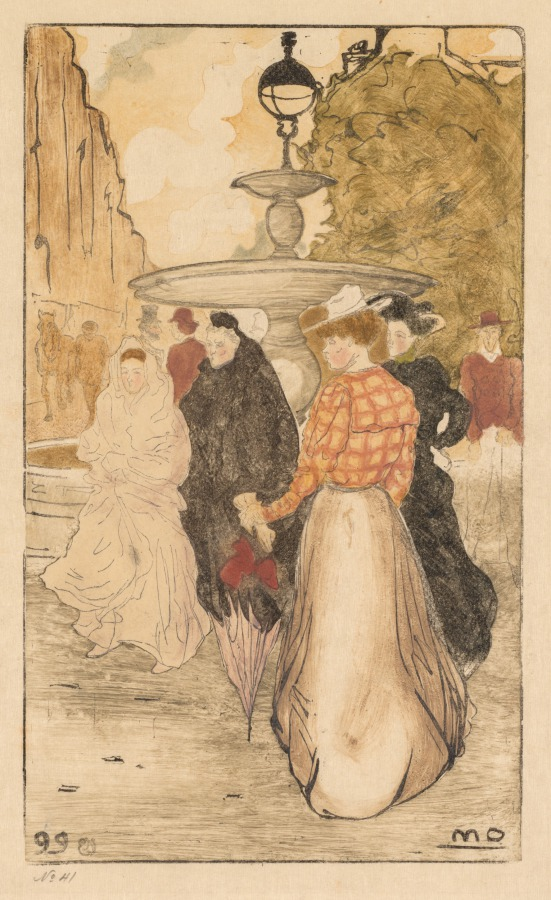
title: Place Saint Georges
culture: France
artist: Maurice Delcourt (French, 1877–1917)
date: 1899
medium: color woodcut and soft-ground etching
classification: Print